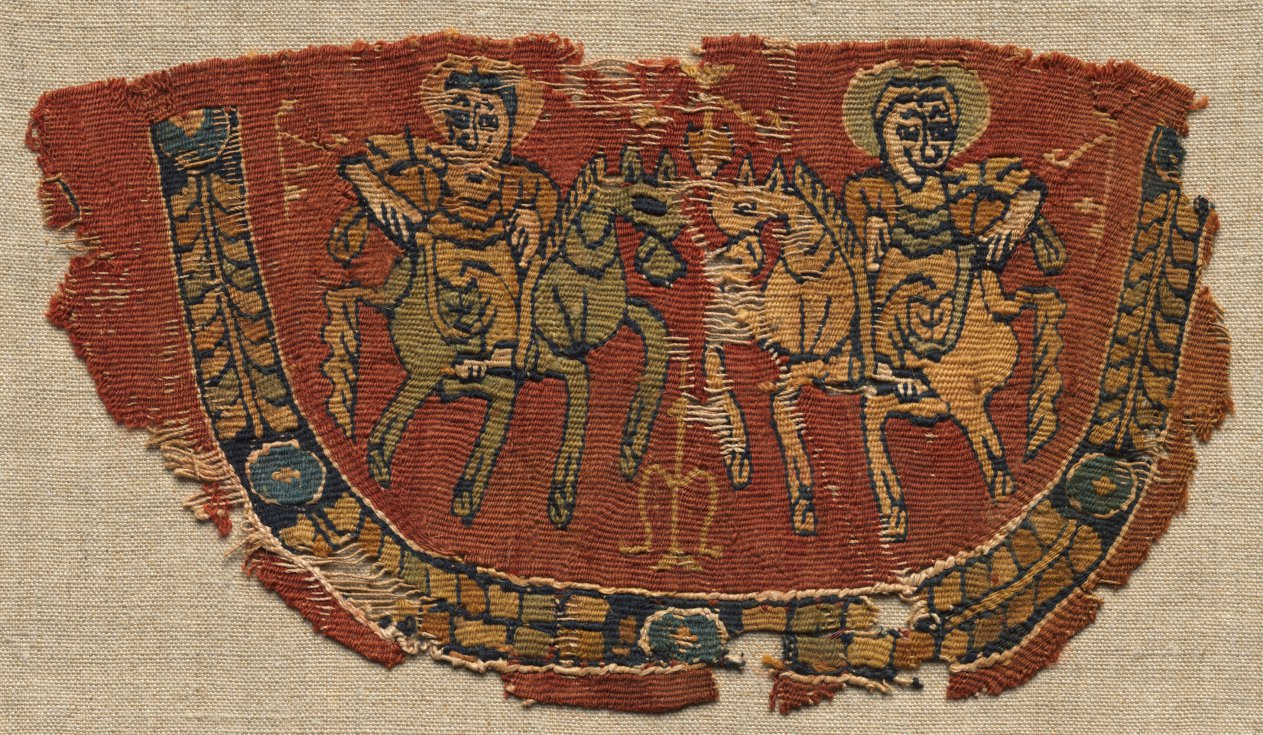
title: Fragment of an Ornamental Border of a Tunic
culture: Egypt, late Abbasid or Tulunic period, 9th century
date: 800s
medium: tapestry weave; wool and linen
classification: Textile